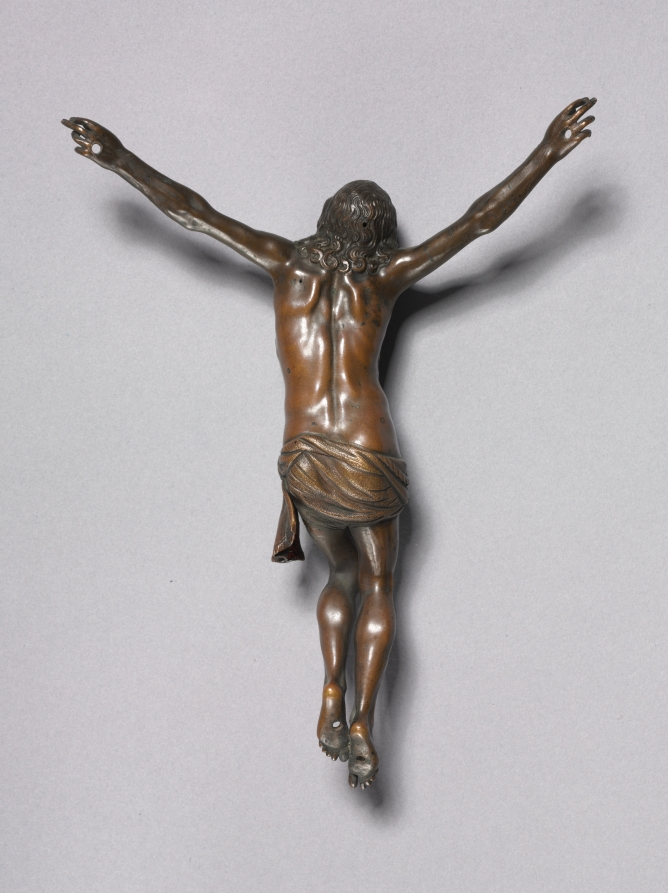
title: Christ Crucified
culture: Italy, Florence(?), 17th century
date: c. 1600–1650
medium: bronze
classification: Sculpture